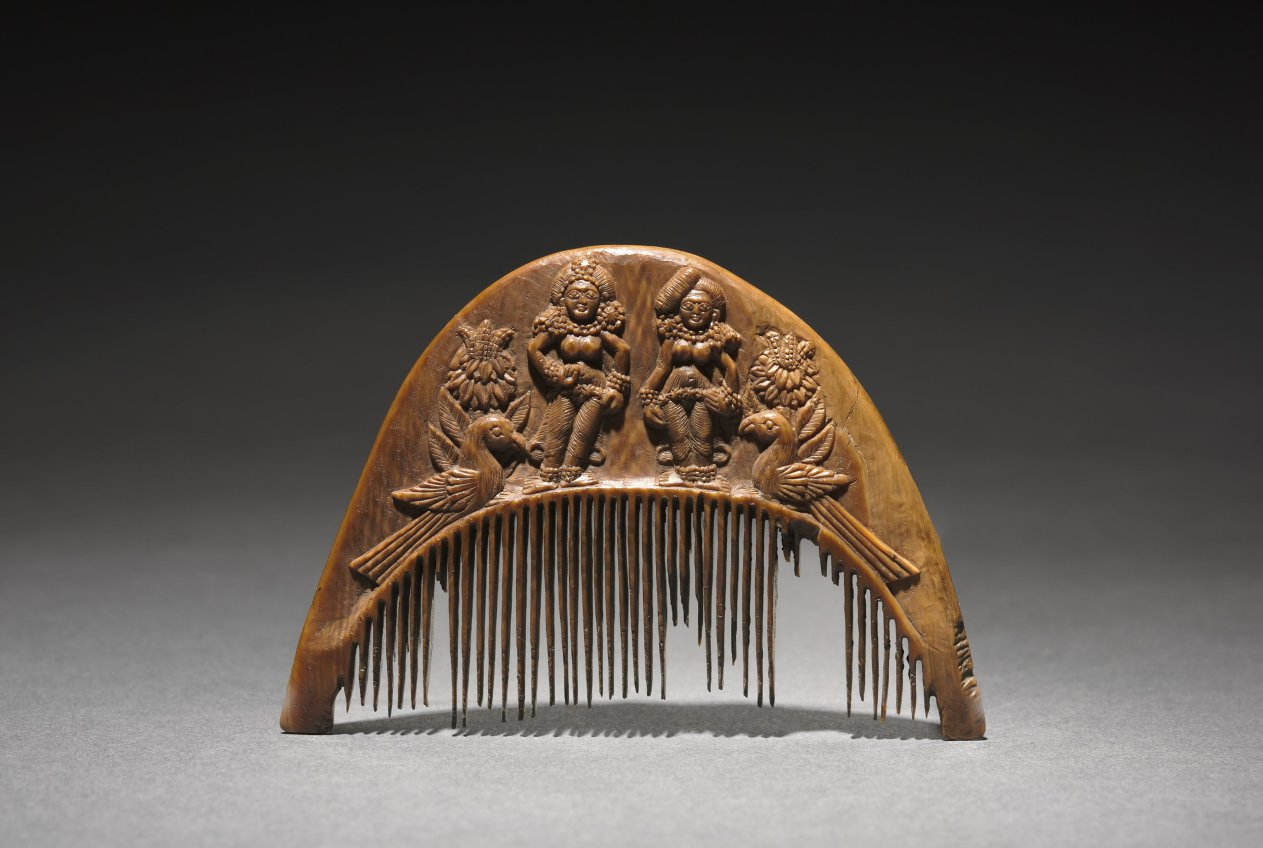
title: Comb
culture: India, Bengal, Chandraketugarh area, Shunga period (185–78 BCE)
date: 200 BCE–100 CE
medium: ivory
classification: Ivory